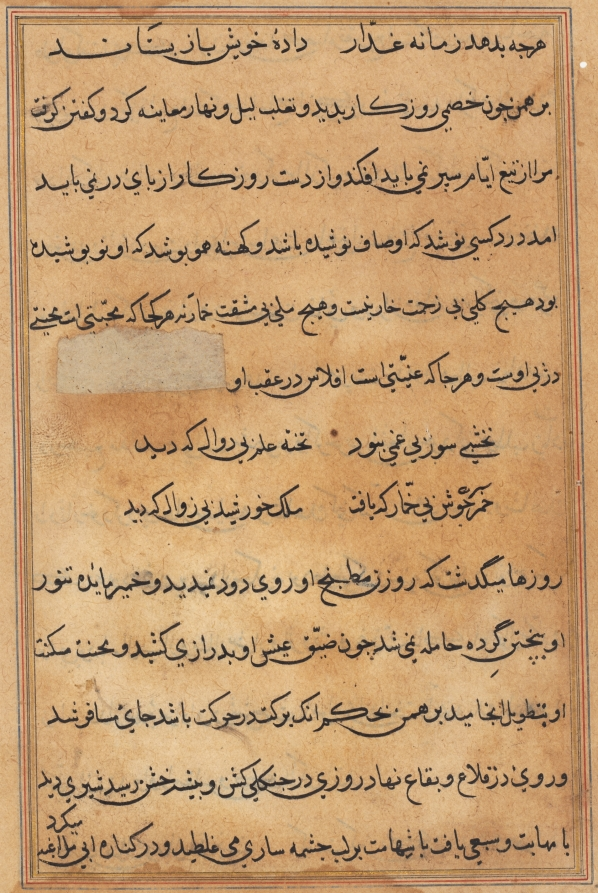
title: Page from Tales of a Parrot (Tuti-nama): text page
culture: Mughal India, court of Akbar (reigned 1556–1605)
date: c. 1560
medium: gum tempera, ink, and gold on paper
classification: Painting